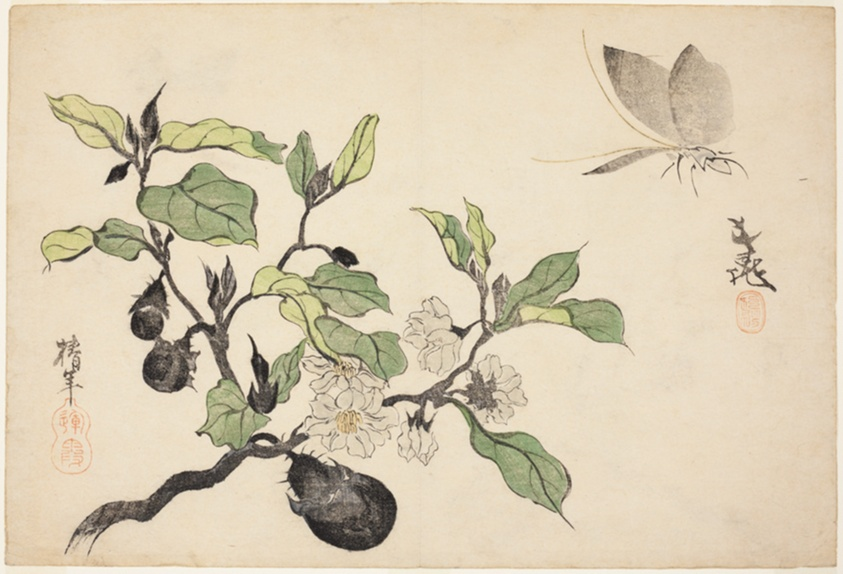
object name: Print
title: Eggplant with fruit and flowers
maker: Ônishi Chinnen (Japanese, 1792-1851)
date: 1829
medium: Double sheet from Aratama Jo.("Album of the New Year") BUNCHO Butterfly Kyoka Shomoku Shusei 1936, listed Aratamajo publis Shijo Surimono print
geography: Japan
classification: print; asian art